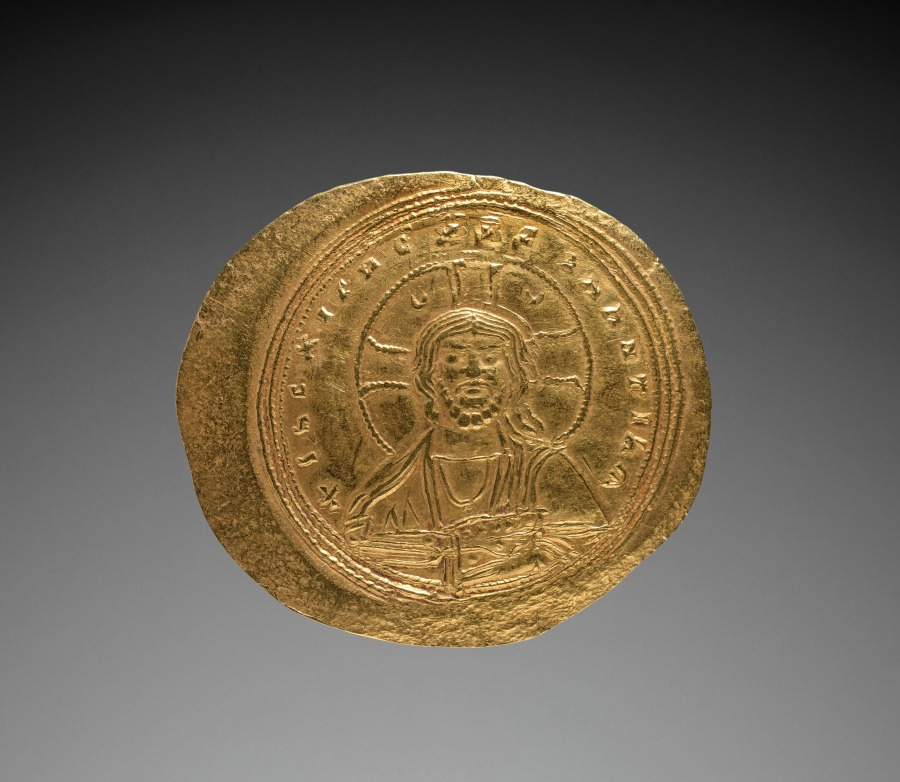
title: Nomisma with Constantine IX Monomachus (obverse)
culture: Byzantium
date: 1042–1055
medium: gold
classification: Coins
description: The vast number of surviving Byzantine coins attests to the level of trade across the empire. Controlled and supervised by the emperor, the producers of coins took care to represent his authority and reflect his stature. Talented artists were recruited to engrave the dies (molds) used for the striking of coins. Emperors increasingly came to include their heirs and co-emperors on their coinage, as well as other family members or even earlier rulers. Coins were recognized, then as now, as small, portable works of art. With their inscriptions and images, Byzantine coins provide valuable documentation of historical events and a record of the physical appearance of the emperors. The solidus is the basic gold coin of 24 karats; the tremissis, a gold coin of one-third the weight and value of the solidus; and the nomisma, which in the 10th century replaced the solidus as the standard gold coin.